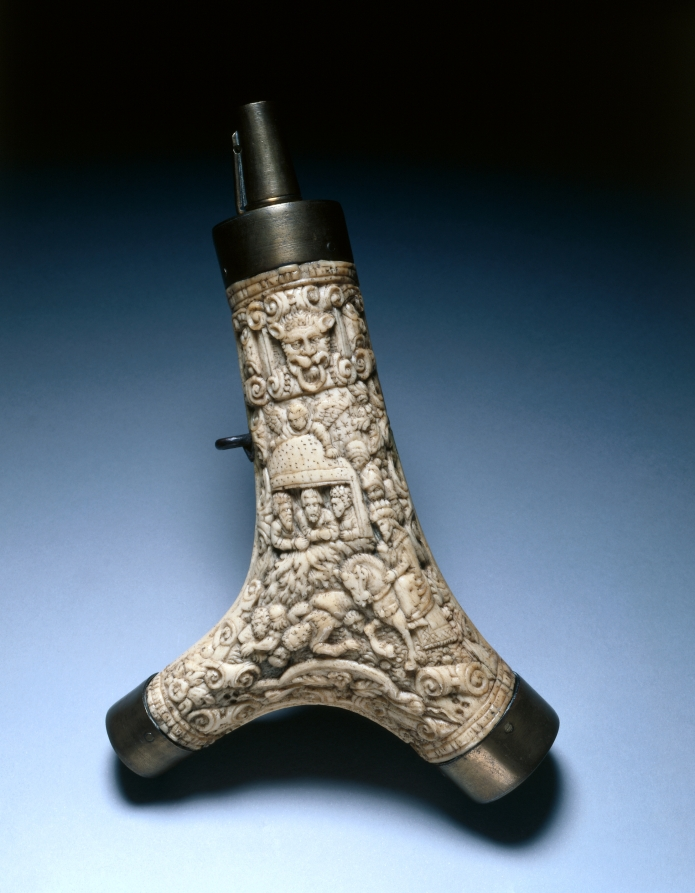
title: Powder Flask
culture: France, late 16th-early 17th century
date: late 1500s-early 1600s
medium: staghorn (two branches) with carved relief decoration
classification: Arms and Armor